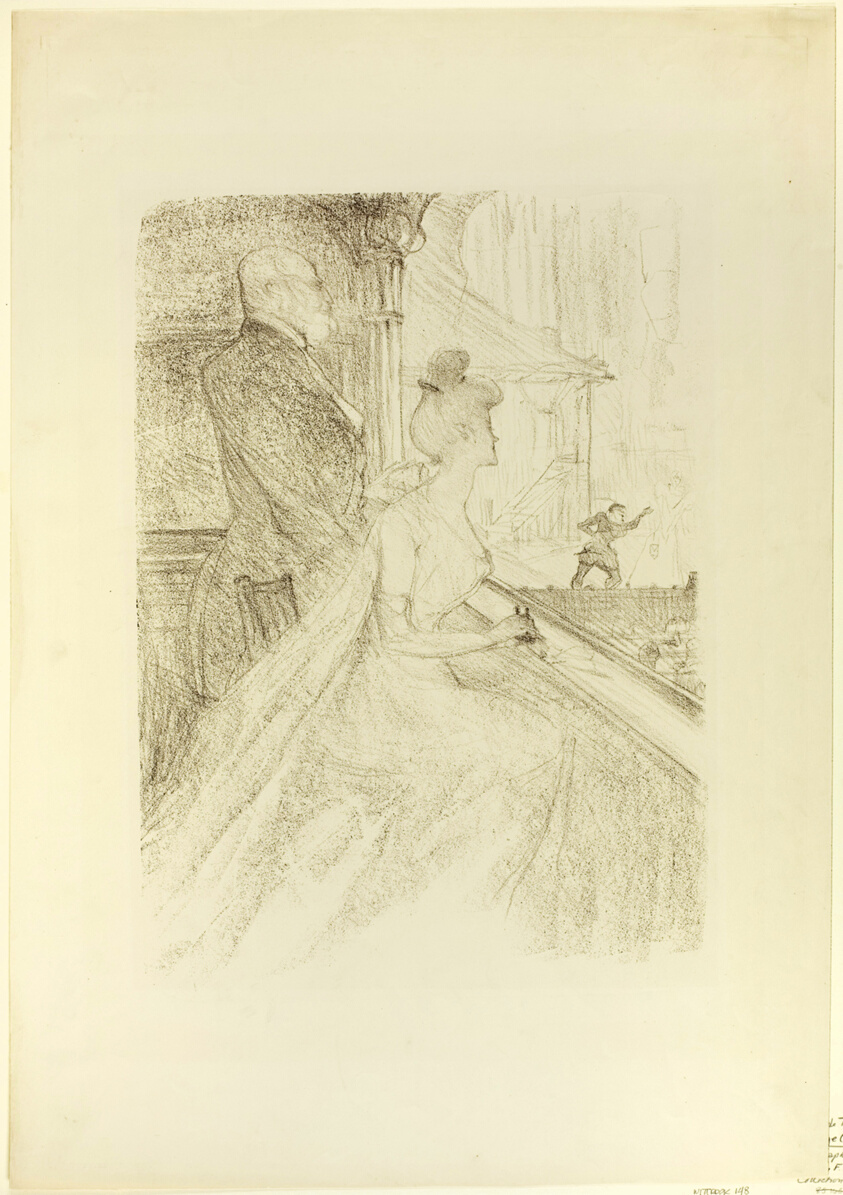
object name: Print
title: The Box, Faust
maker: Henri de Toulouse-Lautrec (French, 1864-1901)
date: 1896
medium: Lithograph in violet black on cream wove paper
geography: France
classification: lithograph; print; prints and drawing